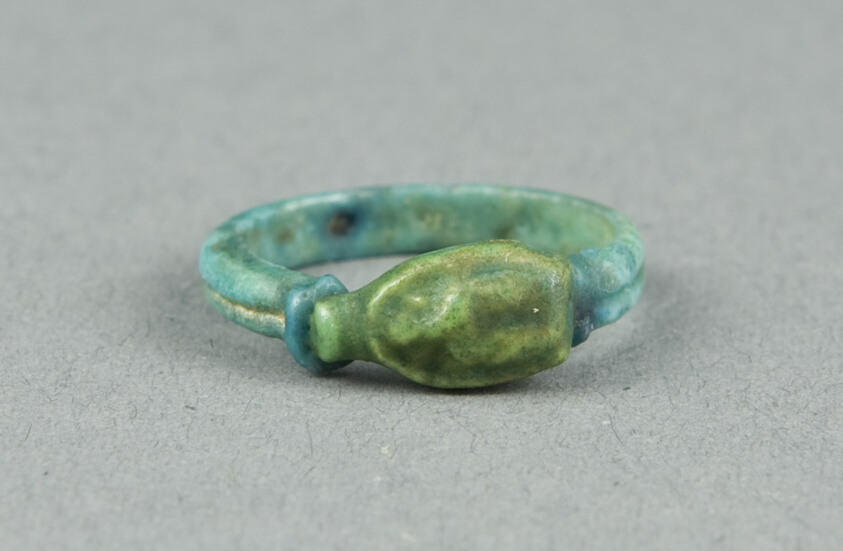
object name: Costume and Accessories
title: Ring: Scarab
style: egyptian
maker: Egyptian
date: New Kingdom, Dynasty 18 (about 1350 BCE)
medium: Faience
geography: Egypt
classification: ring (jewelry); ceramics; jewelry; ancient art; costume; faïence (composite material)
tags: scarab beetle